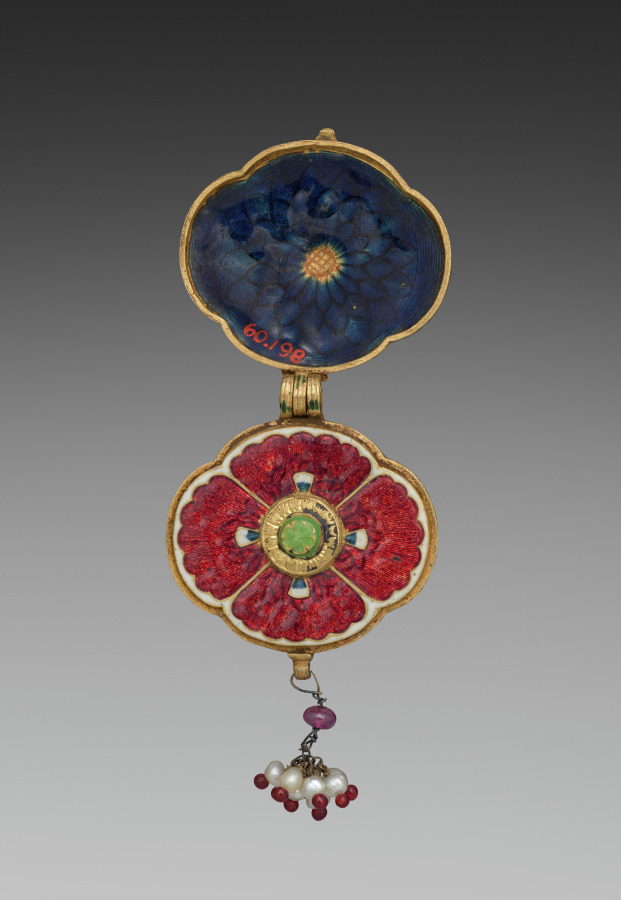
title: Locket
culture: Northwestern India, Rajasthan, Rajput Kingdom of Jaipur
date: 1700s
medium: gold and enamel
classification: Jewelry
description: This locket may have once been an amulet containing prayers and talismans or a container for perfume or other cosmetic items. At the center, a young woman stands between two groupings of large red flowers. The connections between women and nature have ancient precedents in India, often communicating auspicious fertility. Luxury enamels like this were the hallmark of 18th-century Jaipur goldsmiths and jewelry makers. This locket was given to the museum by the Twentieth Century Club, a women’s community group founded in the early 1900s with satellites across the United States.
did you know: Green glass, now mostly lost, once filled the lozenge shapes in the woman’s gown.